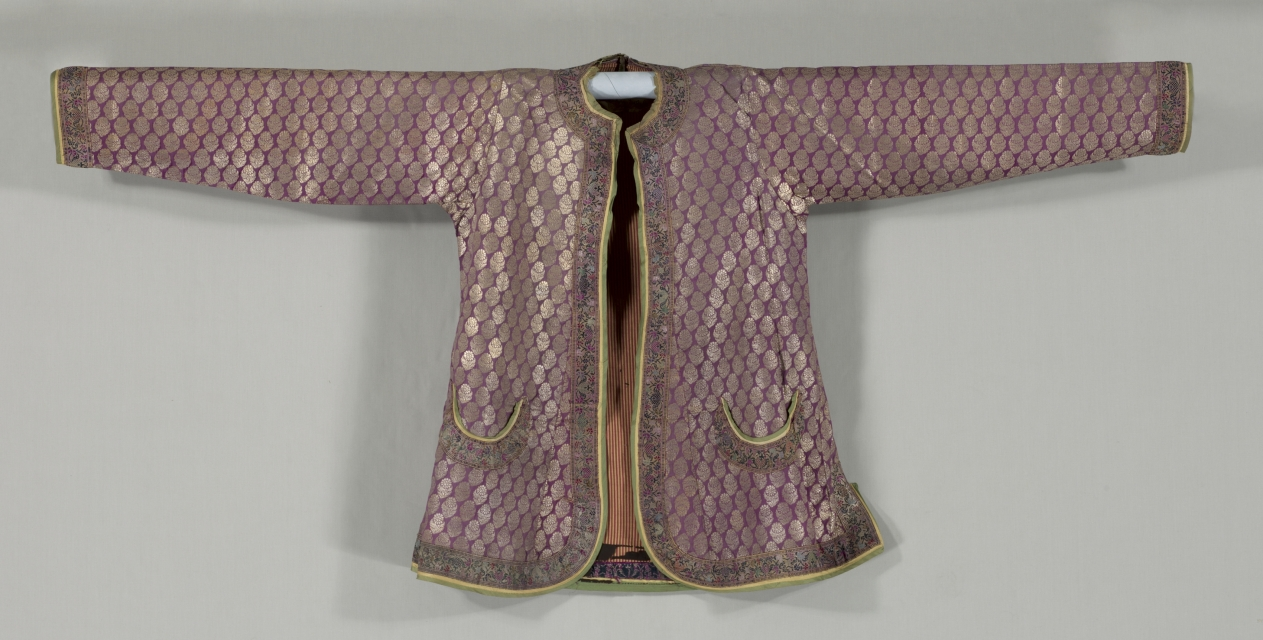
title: Man's Coat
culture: India, Early 19th century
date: c. 1800–1825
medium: brocade, cotton lining, metal thread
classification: Garment